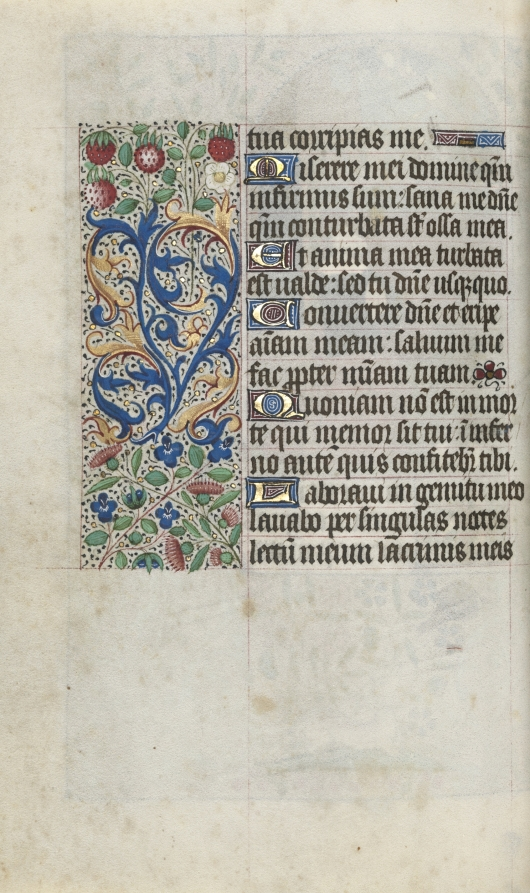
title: Book of Hours (Use of Rouen): fol. 80v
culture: France, Rouen, 15th century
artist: Master of the Geneva Latini (French, active Rouen, 1460–80)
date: c. 1470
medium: ink, tempera, and gold on vellum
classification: Bound Volume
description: In the late 1400s and early 1500s Rouen was an established and important center of book production. The city’s cathedral had a wealthy chapter that spent large sums of money to commission books and to maintain its extensive library. The stationers and booksellers would have likely been concentrated in or near the cathedral precinct. This artist, named after a manuscript now in Geneva, was Rouen’s principal illuminator during the second half of the 1400s.